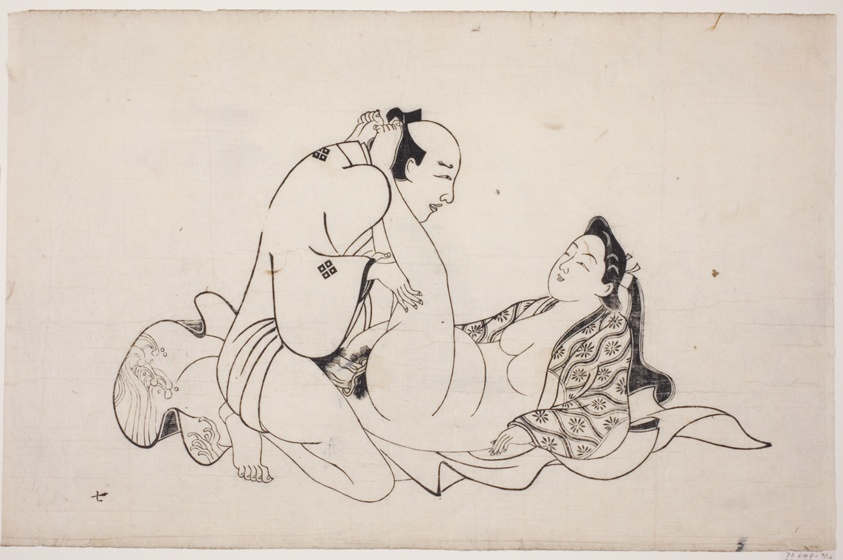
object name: Print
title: A sheet from a shunga album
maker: Japanese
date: 1679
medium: Woodblock print; sumizuri-e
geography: Japan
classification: print